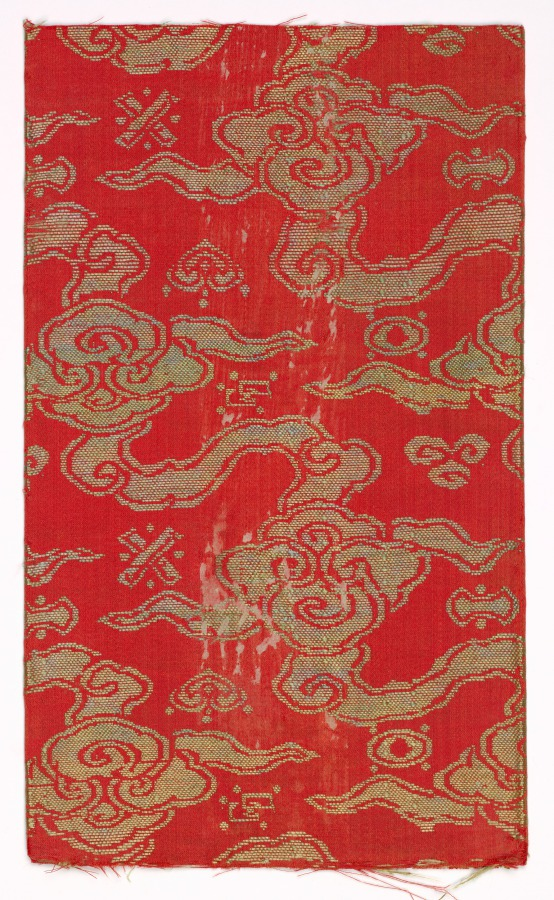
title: Book Cover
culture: China, Qing dynasty (1644-1911)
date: 1680–1720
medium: silk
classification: Textile